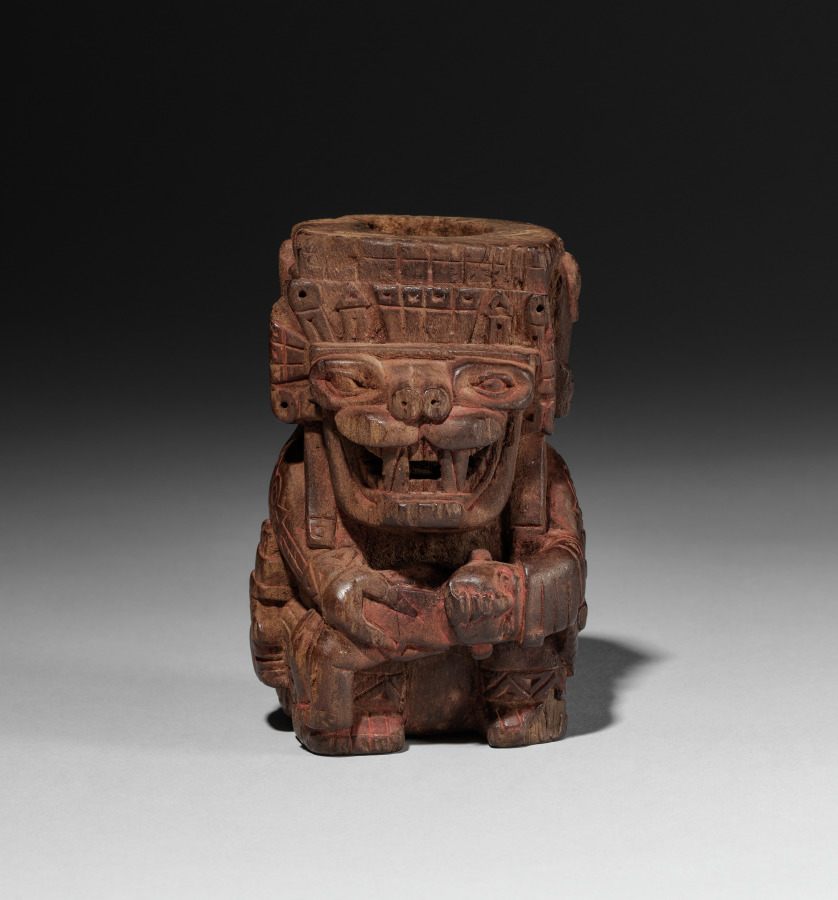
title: Sacrificer Container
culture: Central Andes, Wari style (600-1000)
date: 770–890 (radiocarbon date, 95% probability)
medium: wood and cinnabar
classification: Wood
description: This container assumes the shape of a magnificent, feline-headed, supernatural sacrificer who draws a knife across the throat of the human it holds in its lap. Severed human heads hang from the feline's belt and dangle by the trachea at the back of its headdress. Sacrifice had a place in Wari religious practice, probably as an unusual and exceptionally precious offering made to entice the benevolence of cosmic forces. Indeed, colonial-period Andean people believed that death was a prerequisite for the renewal of the world.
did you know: Traces of cinnabar, a toxic mercuric sulfide, are visible on the container's surface.